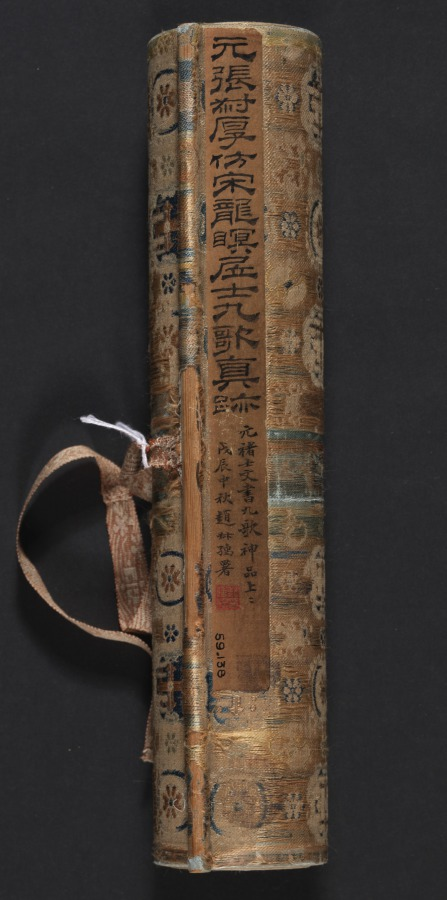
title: Nine Songs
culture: China, Yuan dynasty (1271-1368)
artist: Zhang Wo (Chinese, active c.1336–after 1364)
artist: Chu Huan (Chinese, active 1361)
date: 1361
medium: handscroll; ink on paper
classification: Painting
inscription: 7 colophons and 47 seals: 1 colophon, dated 1361, and 28 seals of Chu Huan 褚奐 (active c. 1361); 1 colophon, dated 1785, and 1 seal of Lu Shihua 陸時化 (1714-1779); 2 seals of Lu Yü-ch'ing (18th c.); 1 colophon, dated 1935, of Ye Gongchuo 葉恭綽 (1881-1968); 1 colophon, dated 1935, of Wu Hufan 吳湖帆(1894–1968); 1 colophon, dated 1938, and 1 seal of Wang Tongyu 王同愈 (1856-1941); 1 colophon, dated 1941, of Wu Huayuan 吳華源 (1893-1972); 1 colophon, dated 1942, and 9 seals of Xu Bangda 徐邦達 (1911–2012); 1 colophon, dated 1942, of Lang Jingshan 郎靜山 (1892-1995); 1 colophon, dated 1944, of Tang Yun 唐雲 (1910-1993); 6 seals of Wang Jiqian [C.C. Wang] 王季遷 (1907–2003).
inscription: Text of The Nine Songs written by Chu Huan at the end of each section.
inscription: 右離騷九歌圖，宋龍溟居士李公本，淮南張渥叔厚所畫妙絕當世。家藏請予書其辭目識于左。至正二十一年辛醜三月旦河南褚奐記。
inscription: Colophon by Lu Shihua 陸時化 (1714–1789): This scroll is fortunate to have been handed down from collections of the right people. Now, after 500 years, its condition is as good as when it was painted. I acquired this from Mr. Shen Guiyu [1673-1769], the President of the Board of Rites. The label is in his handwriting when he was 95 years old. I submit that Chu Huan (t. Shiwen) of the Yuan Dynasty was a native of Qiantang. His "seal" and li writings are in the style of Wu Rui. For example, in [Chu Kuei's] Ming ji lu [A list of masterpieces] is recorded the stele commemorating the restoration of the prefectural school of Kun-shan, the text of which was composed by Yang Weizhen in the twenty-first year of Zhizheng [1361]; and the calligraphy as well as the title in li style was by Chu Huan, who was at that time an assistant judge of the prefecture of Haining in the circuit of Hangzhou. Zhang Wo's zi is Shuhou (叔厚). His literary name is Zhen Qisheng (贞期生). According to [Gu Ying's] Yu shan cao tang ya jii, he liked to paint in the bai-miao or the "pure delineation" style after the method of Li Longmian [Li Gonglin 李公麟], which finds no peer among the ancient masters. This is agreed upon [by Pei Ch'iung] in his Qing jiang zhi who praised [Zhang Wo] as being quite learned and well-versed in many branches of the arts, especially figure painting. Recorded by Lu Shihua [The mountain dweller], listening to the pine, in the twelfth month of the yisi year [1785].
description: Painted in the baimiao, or fine-line drawing style, this ancient work demonstrates the literati’s use of abstract calligraphic brushwork for self-expression. The subject of the “Nine Songs”—songs associated with shamanistic rituals in the ancient Chu kingdom—had traditionally provided artists with myths and legends that they could explore and reinterpret in their own works.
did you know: Divided into eleven sections, the scroll contains illustrations by painter Zhang Wu followed by a transcription of the relevant verse by calligrapher Chu Huan.